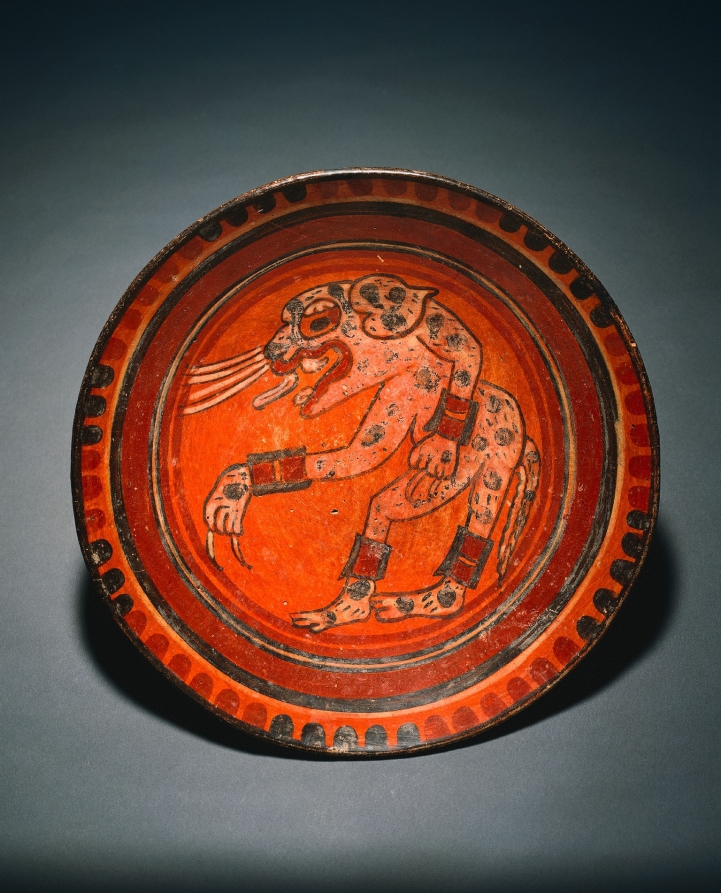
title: Plate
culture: Mexico, Campeche, Maya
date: c. 800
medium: earthenware with colored slips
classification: Ceramic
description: Its pose and jewelry suggest this flamboyantly painted figure may represent a human clad in the skin of a jaguar. Because the jaguar is the largest, most powerful predator in Mesoamerica, it was a natural metaphor for earthly and supernatural power alike.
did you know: Apex predators like jaguars are natural power metaphors.